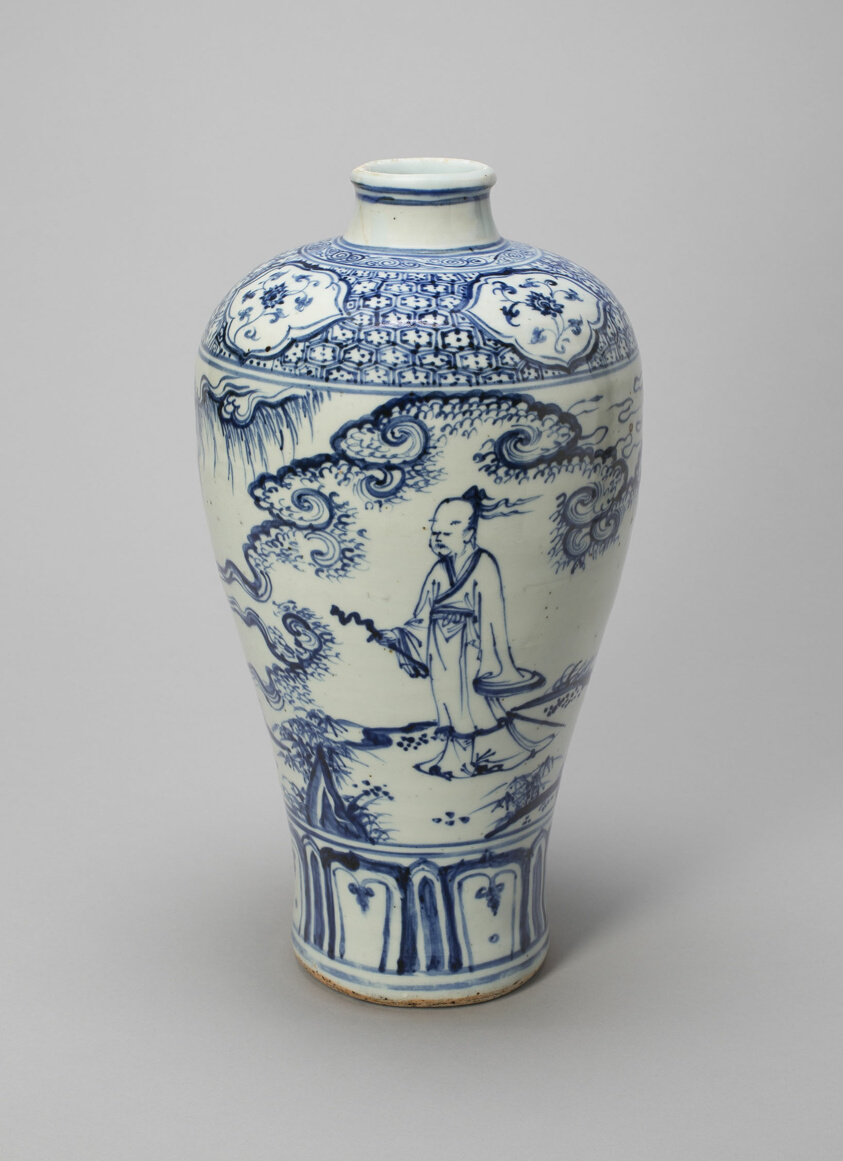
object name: Vessel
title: Elongated Bottle-Vase (Meiping) with a Scholar-Gentleman and Attendant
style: Chinese (culture or style)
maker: China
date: Ming dynasty (1368–1644), 15th century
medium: Porcelain painted in underglaze blue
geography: China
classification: vase; porcelain; vessel; asian art; ceramics